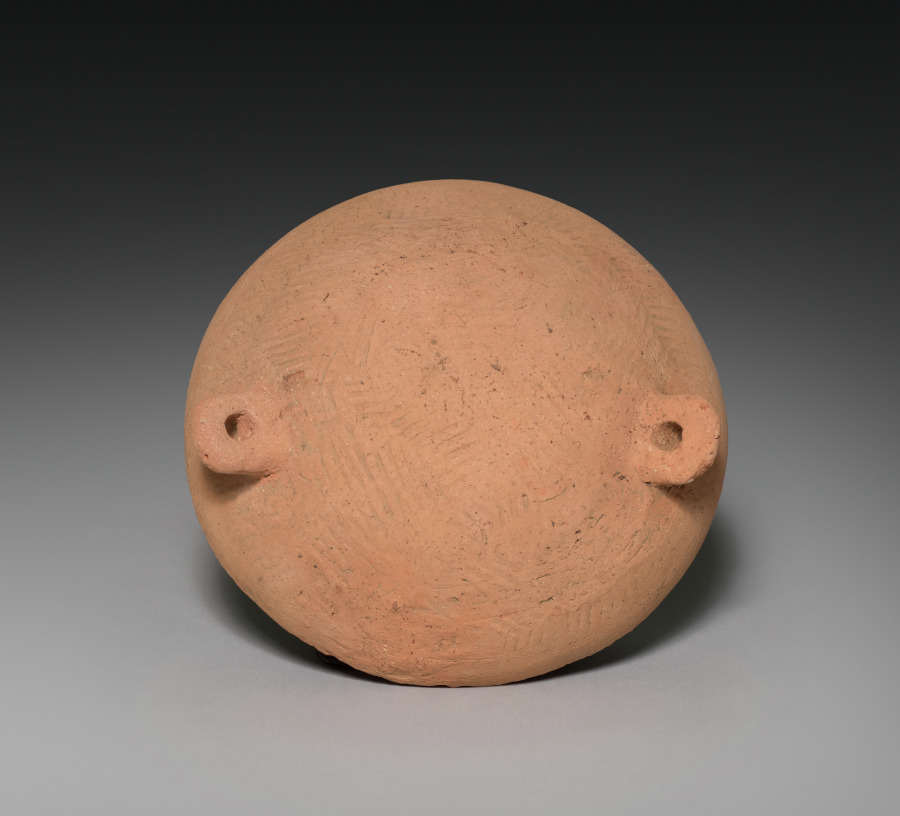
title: Lidded Vessel with Loop Handles (lid)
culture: Korea, Iron Age (c. 300–57 BCE)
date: 300–1 BCE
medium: earthenware, with impressed, paddled, and incised decoration and red slip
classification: Ceramic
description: This small storage jar was hand built from coils of clay before it was finished on a potter's wheel. The thick, vertical ridges covering the surface were impressed into the wet clay using a carved wooden paddle. This network of raised lines was then intersected by four incised lines coursing around the bulbous form and separating the body into lower and upper areas with deft visual simplicity. Such direct, effective design solutions to ceramic decoration appear frequently in early Korean ceramics. The two perforations in the upper body were no doubt used to help secure the lid to the body with a cord.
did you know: Closed kilns built on hills became widely used for producing this type of pottery vessel in Korea during the Three Kingdoms period.